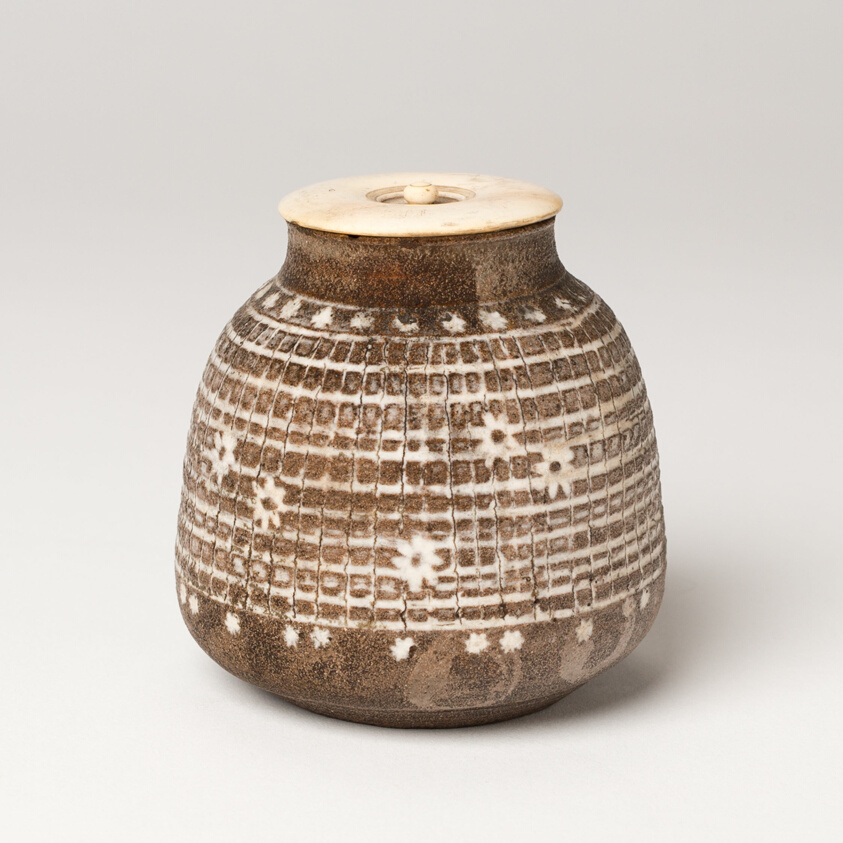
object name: Decorative Arts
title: Tea Caddy (Cha-ire)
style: Japanese (culture or style)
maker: Japan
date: 19th century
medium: Glazed stoneware; ivory lid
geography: Mishima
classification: porcelain; asian art; ceramics; vessel; decorative arts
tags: tea